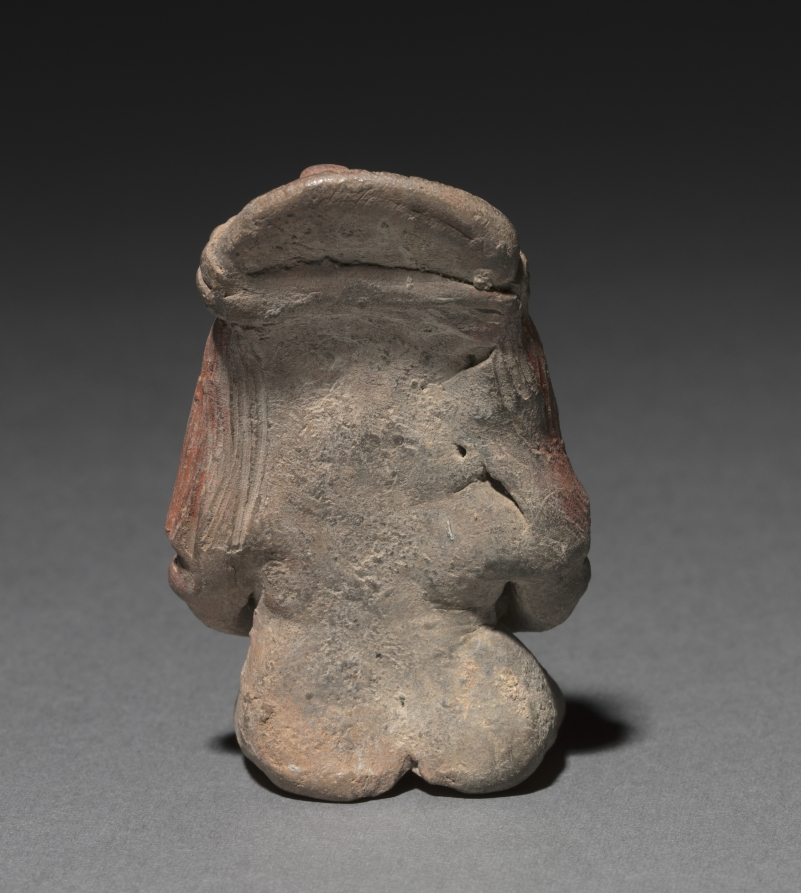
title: Seated Figurine Wearing a Bracelet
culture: Mesoamerica, Guanajuato or Michoacán, Chupícuaro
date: 300 BCE–300 CE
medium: ceramic and pigment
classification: Ceramic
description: Clay figurines were the earliest and most common art form in Mexico and other countries in the ancient Mesoamerican (Middle American) culture region. Made first by hand and later with molds, most figurines belong to the traditions of commoners, such as farmers, rather than those of elites.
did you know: Clay figurines were the earliest and most common art form in the ancient Mesoamerican culture region.